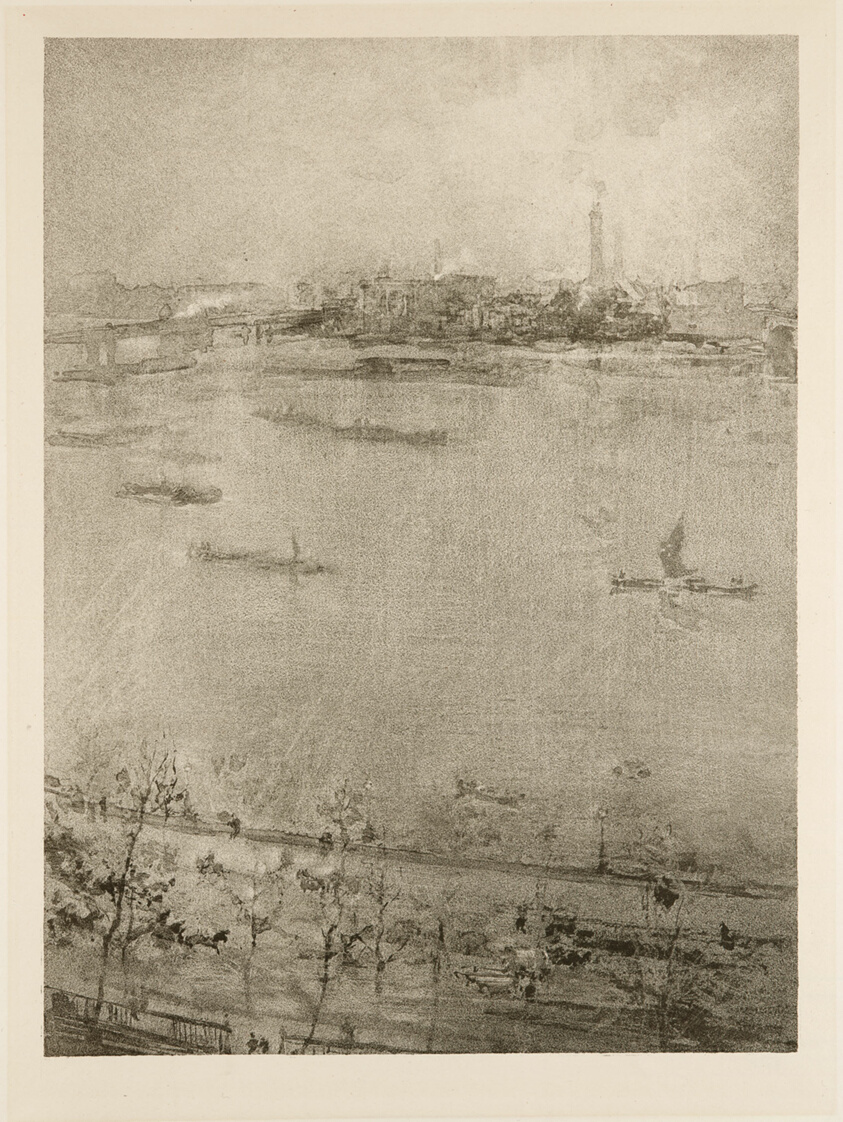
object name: Print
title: The Thames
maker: James McNeill Whistler (American, 1834-1903)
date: 1896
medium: Lithotint in black, with scraping on stone, on cream wove proofing paper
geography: United States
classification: lithotint; lithograph; print; prints and drawing; paper